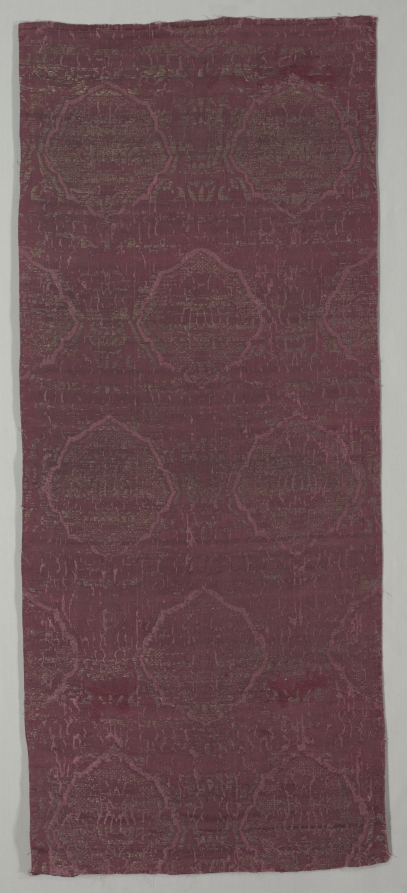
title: Textile Fragment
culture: Italy, 16th century (probably)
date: 1500s (probably)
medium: plain compound satin; silk and metal thread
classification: Textile